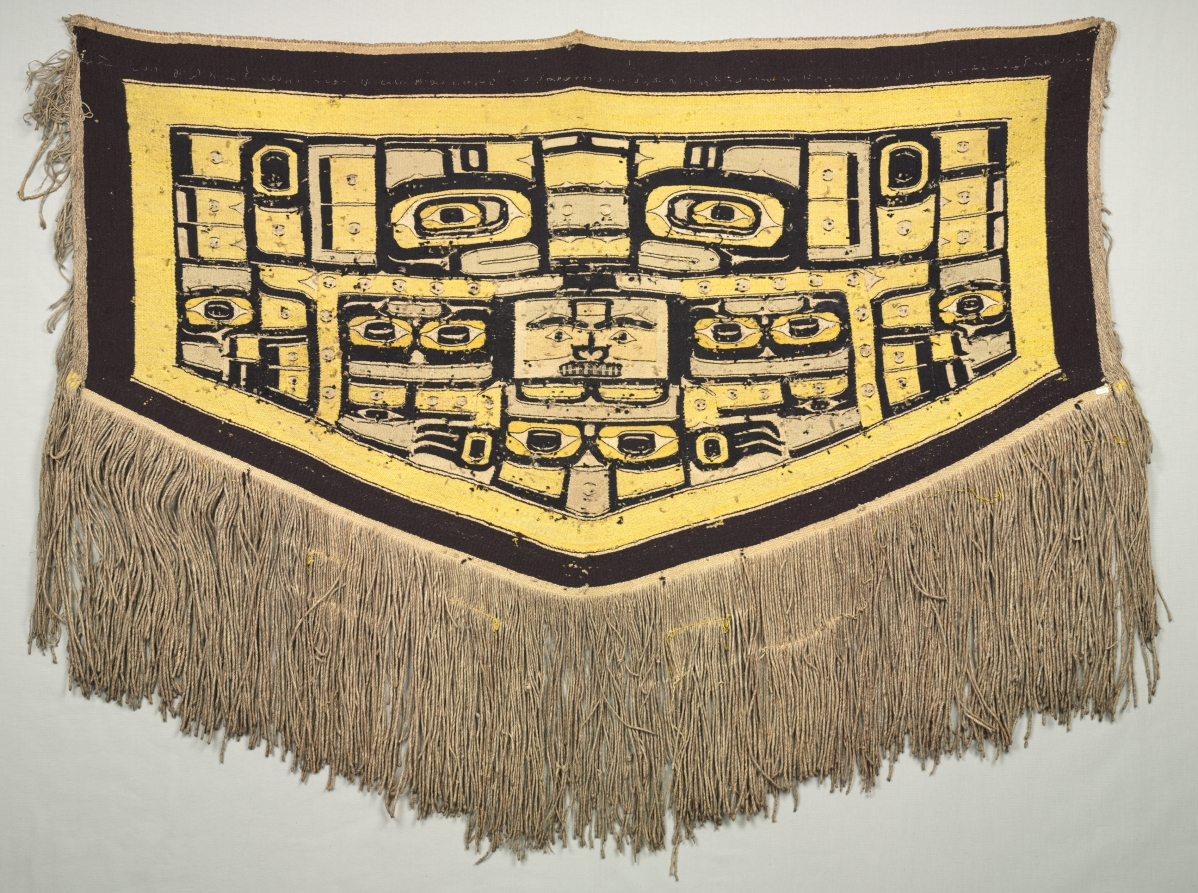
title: Ceremonial Garment (Naaxein) (Chilkat Blanket)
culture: America, Native North American, Northwest Coast, Tlingit, late 19th century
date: late 1800s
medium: weft twining: cedar bark wrapped with mountain goat hair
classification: Textile